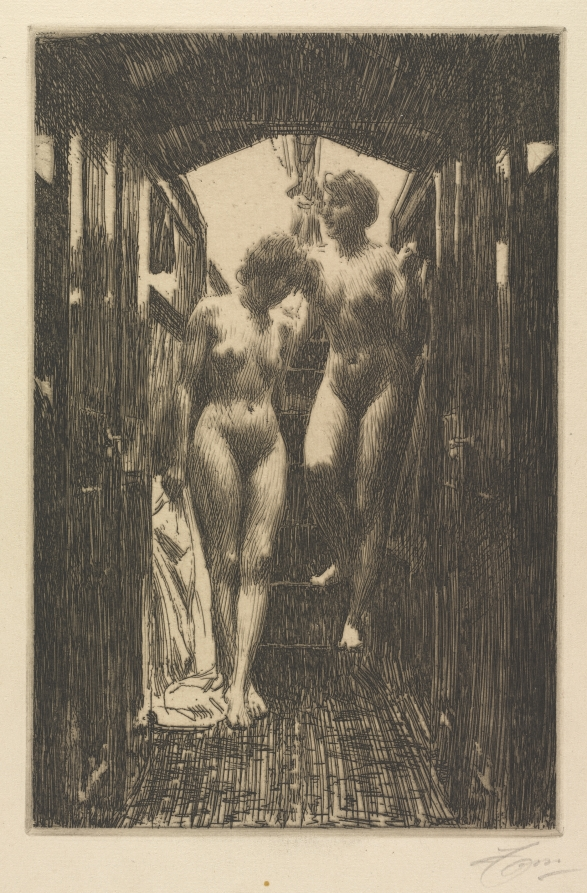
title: Cabin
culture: Sweden, 20th century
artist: Anders Zorn (Swedish, 1860–1920)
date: 1917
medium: etching and drypoint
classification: Print